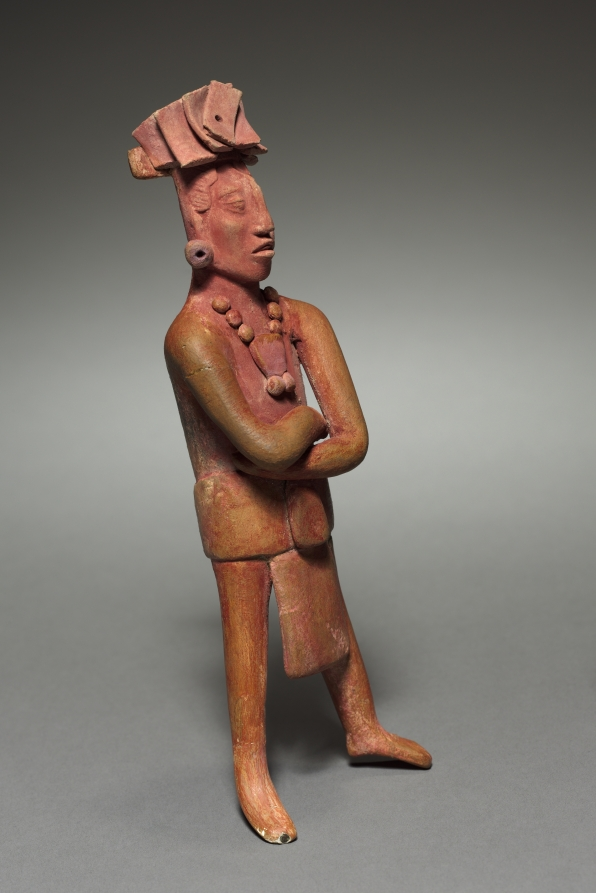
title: Figure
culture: Mexico, Jaina, Campeche, Maya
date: 317–987 CE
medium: terracotta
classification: Ceramic